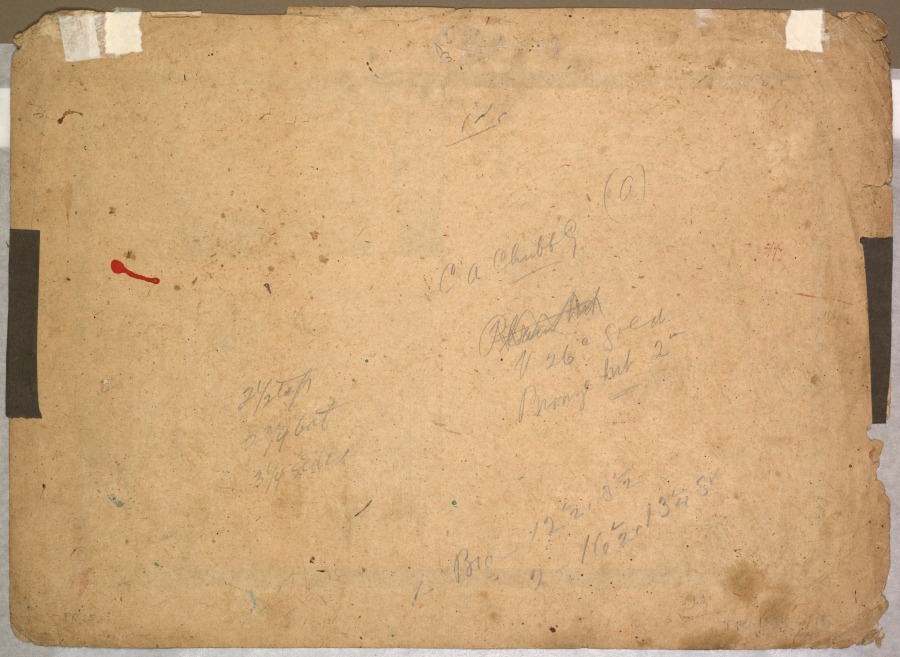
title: King Bana in his court, from an Usha-Aniruddha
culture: Northern India, Pahari kingdoms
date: c. 1760–70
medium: Gum tempera and ink on paper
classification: Painting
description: This portrait of a demon king depicts him listening to the report of one of his ministers. He may be hearing the news that his daughter Usha has been secretly receiving Krishna’s grandson Aniruddha in her bedchamber. The artist has depicted Bana with his 20 arms emerging like tentacles from his body. The members of his multicolored demon court are imaginatively rendered combinations of beasts and humans. In the background, demons harass holy men by burning their huts and chasing them away from their settlements.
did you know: Clara Taplin Rankin, the donor of this painting, was a trustee of the CMA as well as the Musical Arts Association and the Cleveland Institute of Music.